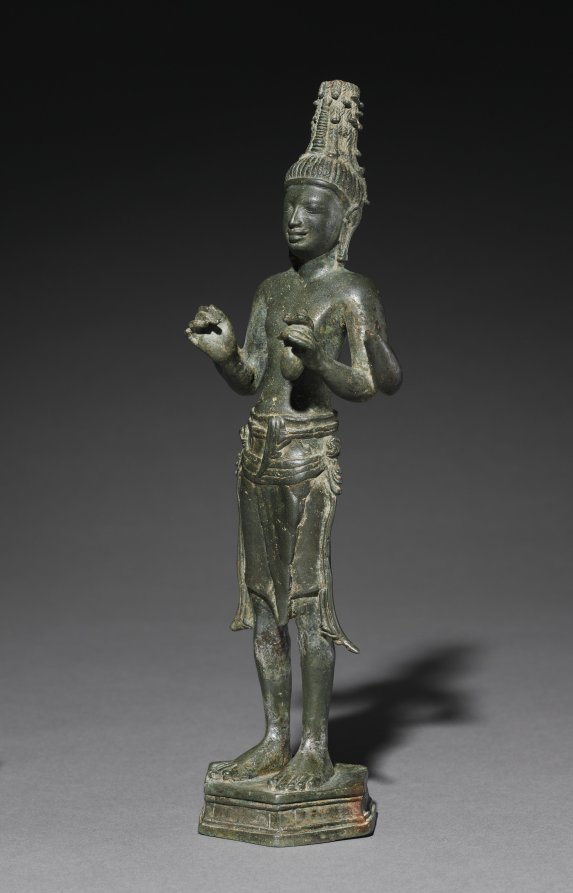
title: Maitreya: The Buddha of the Future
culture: Cambodia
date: 600s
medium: bronze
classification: Sculpture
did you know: The slender fingers of the left hand hold a water pot while the right hand is in the gesture of the vitarka mudra, a gesture of explanation and exposition.